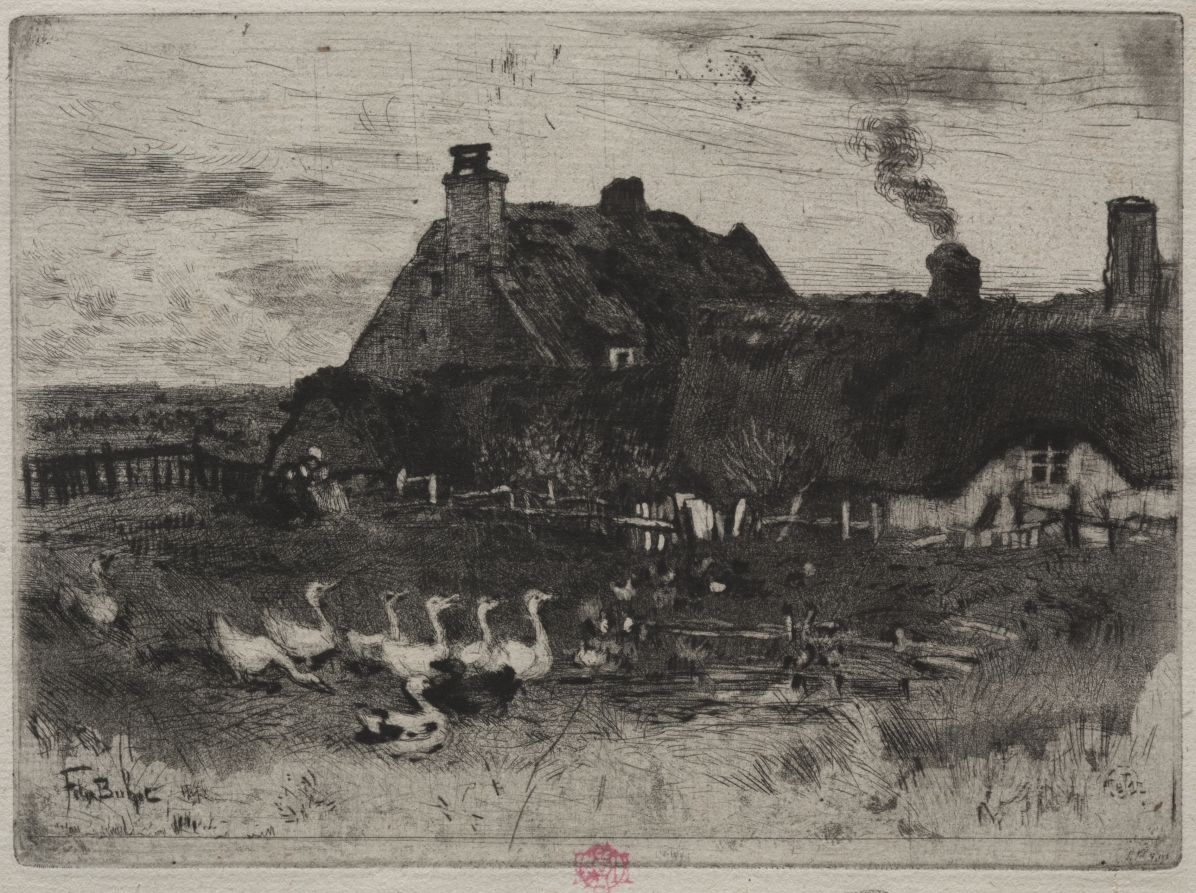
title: The Little Thatched Cottages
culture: France, 19th century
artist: Félix Hilaire Buhot (French, 1847–1898)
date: 1878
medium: etching, drypoint and aquatint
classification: Print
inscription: inscribed and signed, in graphite, lower right: epreuve d'artiste Felix Buhot